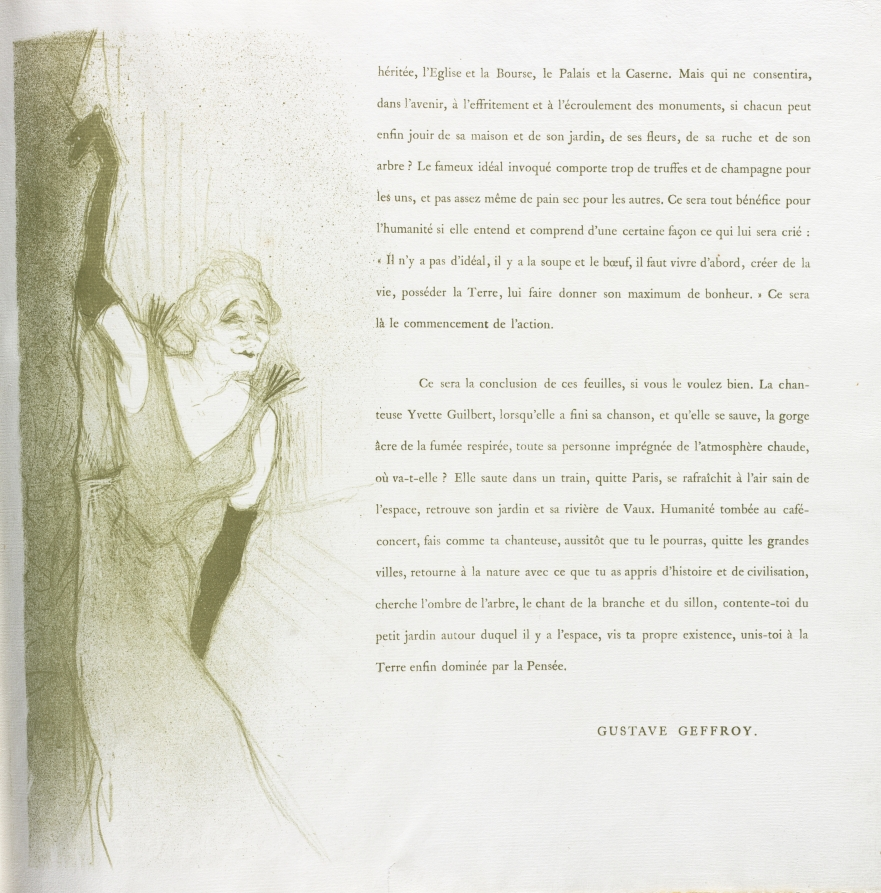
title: Yvette Guilbert-French Series: No. 16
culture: France, 19th century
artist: Henri de Toulouse-Lautrec (French, 1864–1901)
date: 1894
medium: lithograph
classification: Bound Volume